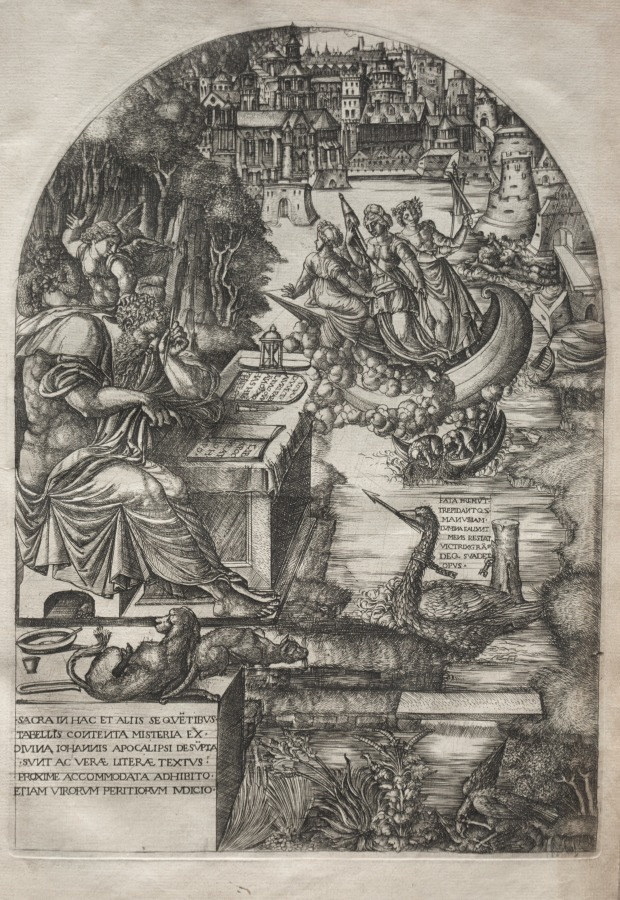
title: The Apocalypse (bound volume)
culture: France, 16th century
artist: Jean Duvet (French, 1485–1561)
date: 1555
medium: engraving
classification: Print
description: This print is part of a bound volume of works illustrating the a narrative of the Apocalypse, taken from the Revelation of Saint John in the Bible. The 23 engravings in the series occupied the artist for a number of years and represent his greatest artistic achievement. The museum's volume is one of only seven known complete sets. Jean Duvet was one of the first major printmakers in France and one of the most original artists of the 1500s. Although he worked mostly in the provincial city of Langres, he became aware of Italian art through the circulation of prints—notably those of Marcantonio Raimondi. His solidly modeled human figures reflect the influence of the Italian High Renaissance. Duvet, however, developed an idiosyncratic, highly artificial style with crowded compositions that ignore rational space in favor of ornamental surface patterns.